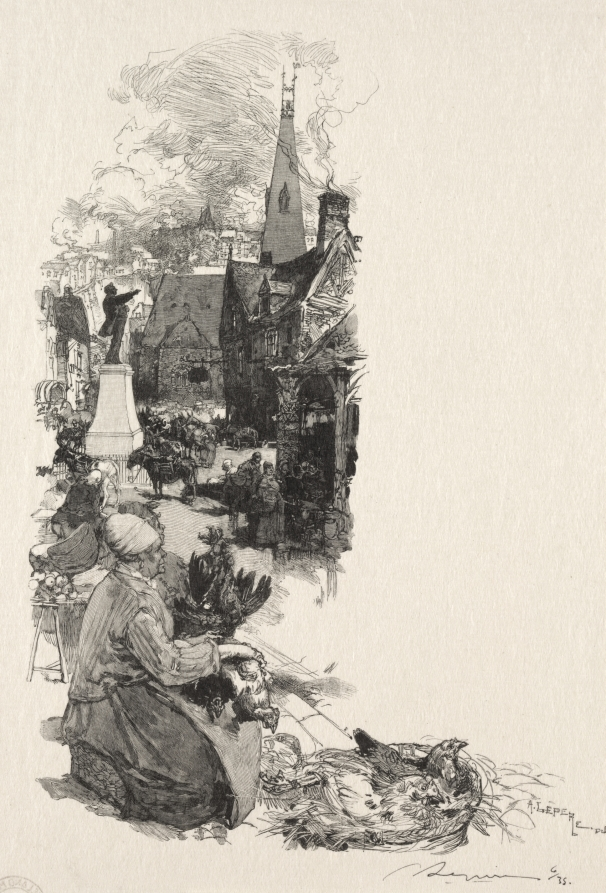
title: Statue d'un Grand Homme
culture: France, 19th-20th century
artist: Auguste Louis Lepère (French, 1849–1918)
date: c. 1870–1918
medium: wood engraving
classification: Print